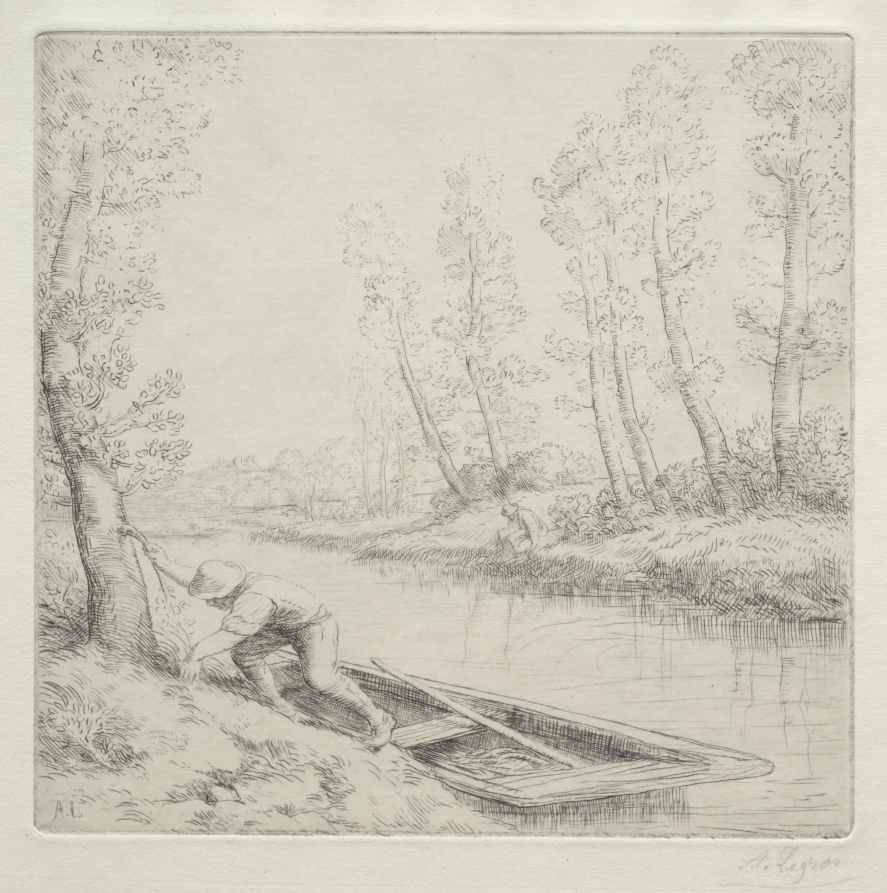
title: Morning on the River (Le Matin sur la rivière)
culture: France, late 19th-early 20th Century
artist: Alphonse Legros (French, 1837–1911)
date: c. 1900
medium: drypoint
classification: Print